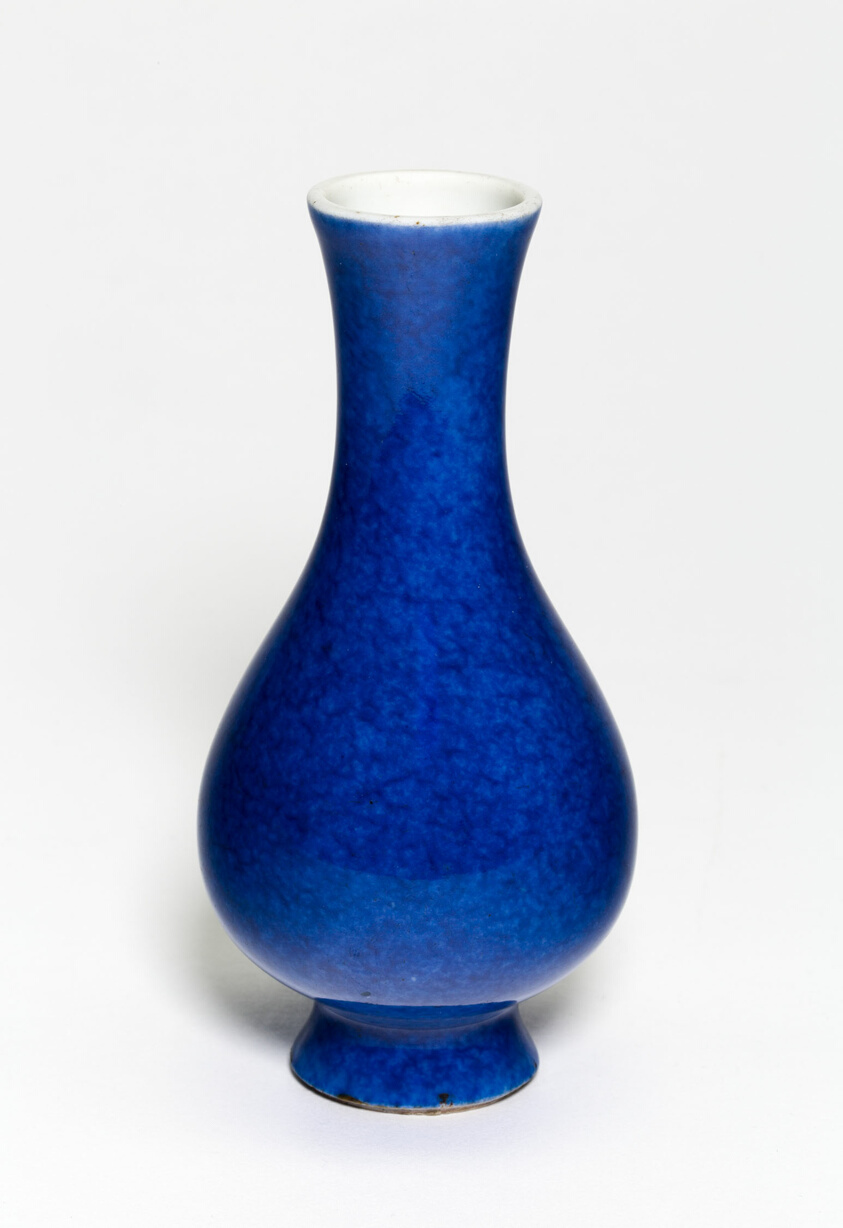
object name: Vessel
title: Pear-Shaped Vase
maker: China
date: Qing dynasty (1644–1911), Kangxi period (1662–1772) or later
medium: Porcelain with powder blue glaze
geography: China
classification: porcelain; asian art; ceramics